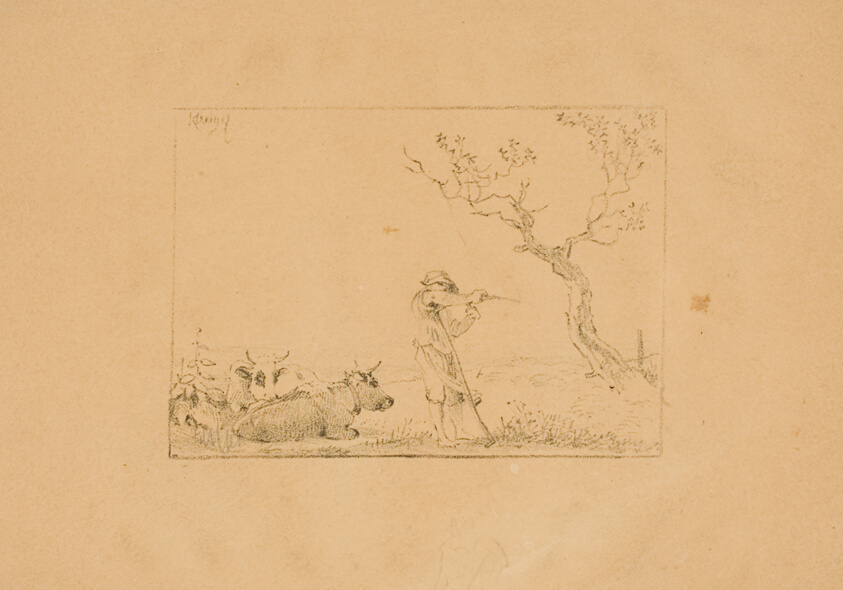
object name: Print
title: Herdsman Sharpening a Scythe, with Cattle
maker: Johann Christian Klengel (German, 1751-1824)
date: 19th century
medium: Lithograph on paper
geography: Germany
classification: lithograph; print; prints and drawing